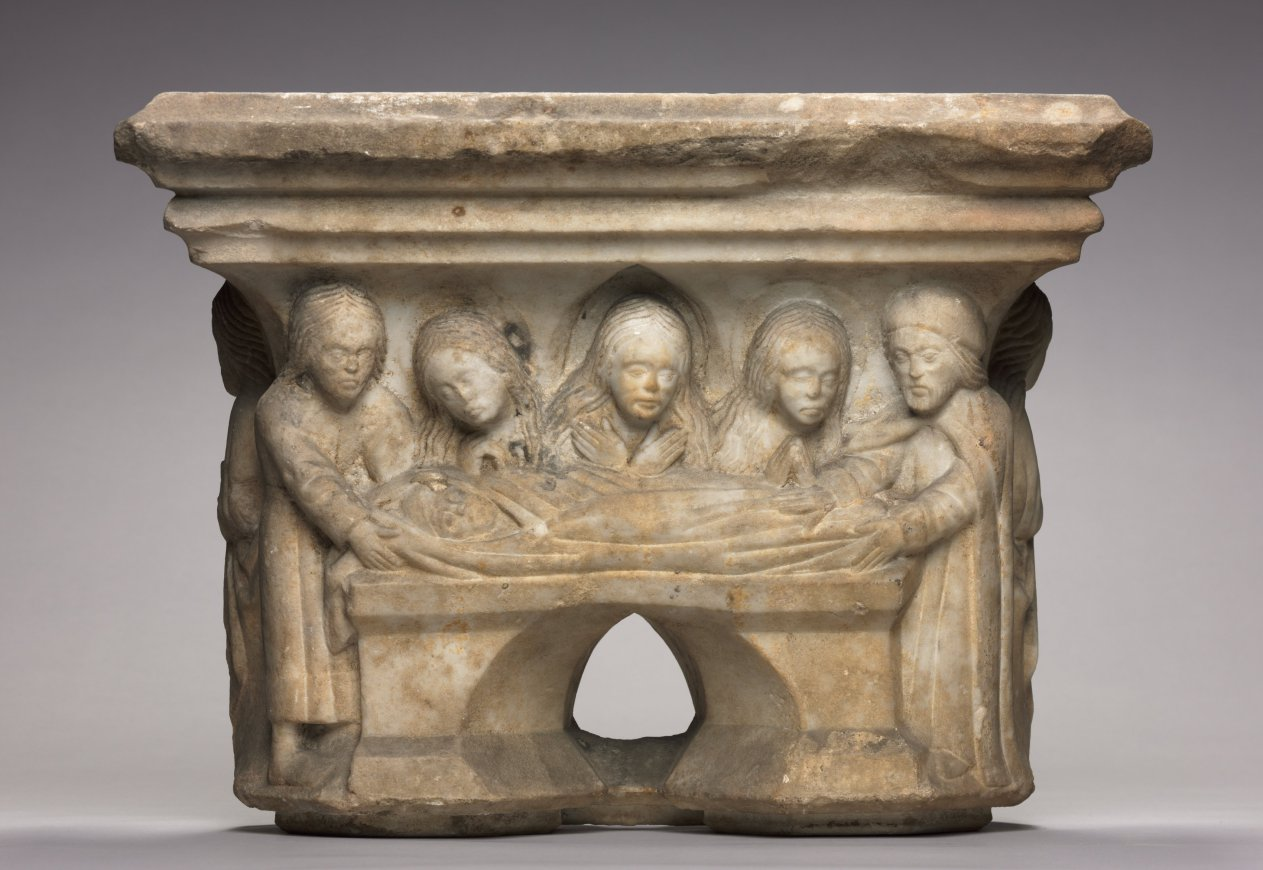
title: Engaged Capital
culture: Southern France, Abbey of Larreule, near Tarbes, 15th century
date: 1400s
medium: limestone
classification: Sculpture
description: This capital belongs to a surviving group including other architectural fragments that once decorated the cloister of the Abbey of Larreule. A cloister was a covered walkway or arcade, usually around all four sides of a square area of grass (the "cloister garth"). The seclusion of the cloister was the monks’ exclusive domain, off limits to others. Here, the monks were supposed to pray, study, meditate, and exercise in privacy and solitude. Such cloister capitals served both to instruct the monks and as a focus for their devotions. Other capitals in this series are installed in the Jardin Massey at Tarbes, near the original abbey. An arch from Larreule has been assembled with other associated French capitals at The Cloisters in New York.